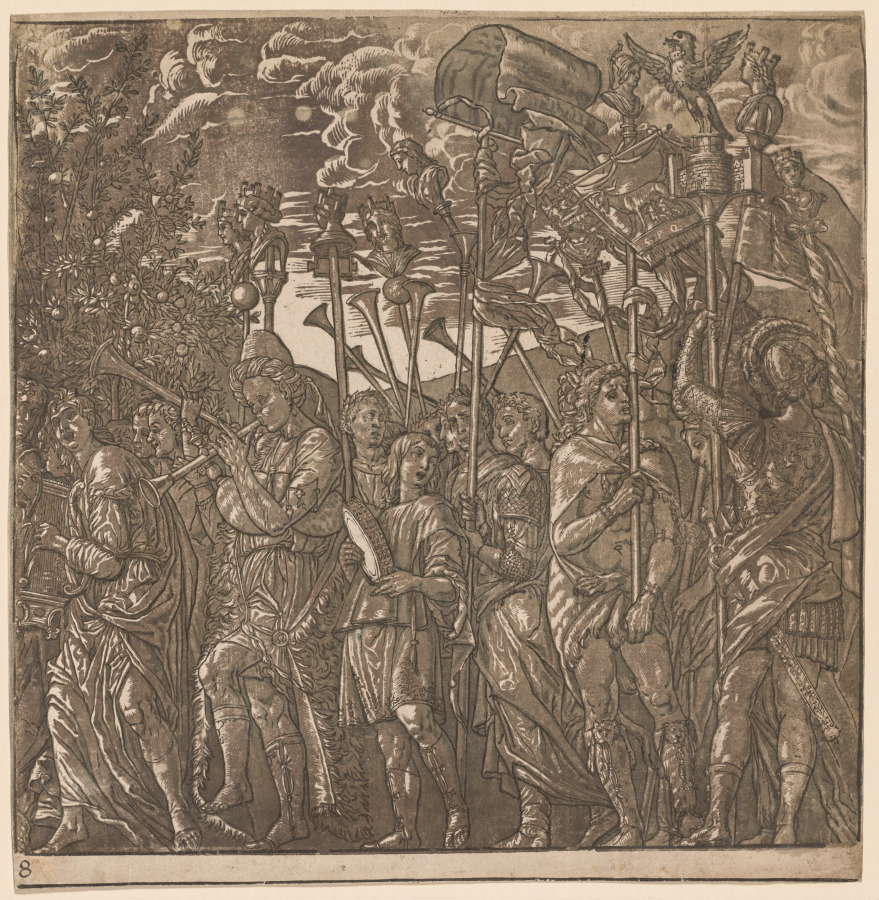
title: The Triumph of Julius Caesar: Soldiers Carrying Banners and Standards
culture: Italy, 16th century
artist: Andrea Andreani (Italian, about 1558–1610)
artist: after Andrea Mantegna (Italian, about 1431–1506)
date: 1593–99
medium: chiaroscuro woodcut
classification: Print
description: Commissioned by Duke Vincenzo Gonzaga, this series of chiaroscuro woodcuts reproduces Andrea Mantegna’s Triumph of Julius Caesar, painted a century earlier. The scenes imaginatively portray the triumphal procession of the renowned Roman general and consul Julius Caesar following his successful defeat of Gaul in 52 BC. Each section of the continuous frieze shows elements typical of these parades, sanctioned by the Roman Senate and described in ancient texts. The printed suite’s frontispiece features a portrait bust of Mantegna, and the text below boasts that the famous paintings attracted many viewers. People who owned sets of these woodcuts often tacked them up to create a decorative frieze. Andreani issued the prints with a sheet of classical columns that could be cut out and placed between the scenes. Two fragments of these columns, colored orange, still flank the fourth scene.